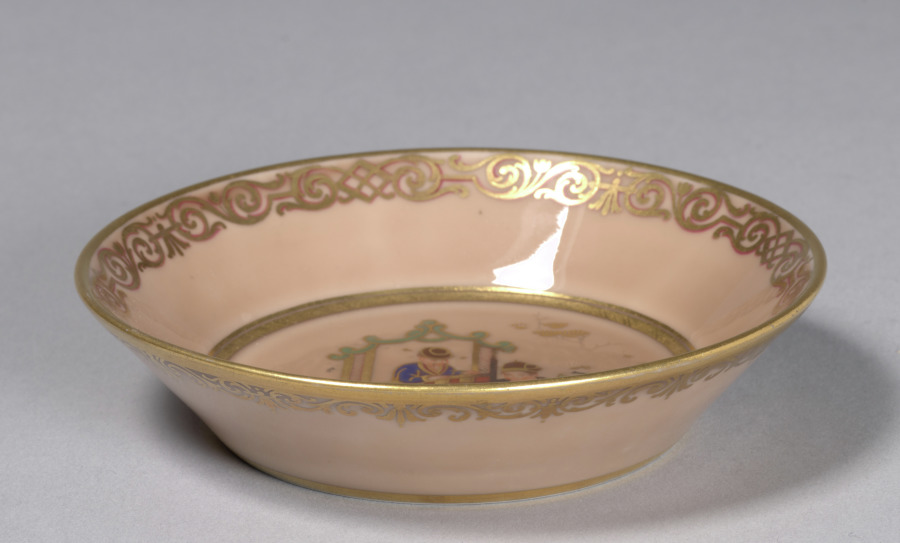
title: Saucer (Soucoupe)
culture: France, Sèvres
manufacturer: Sèvres Porcelain Factory (French, est. 1756)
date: 1778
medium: hard-paste porcelain with overglaze enamel decoration and gilt and silver decoration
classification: Ceramic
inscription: Interlaced Ls surmounted by a crown with date letters 'AA' enclosed; 'L.' below (in red); two underglaze dots (in blue)